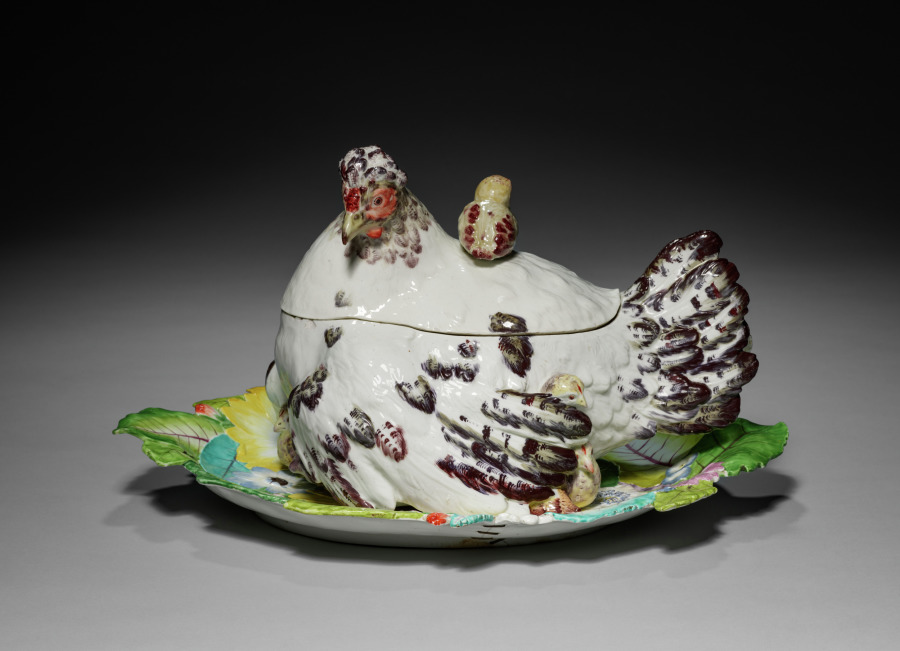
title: Hen and Chicks Covered Tureen on Stand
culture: England, London, Chelsea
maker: Chelsea Porcelain Factory (Britain, London, 1745–84)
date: c. 1755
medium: soft-paste porcelain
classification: Ceramic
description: The ceramic factory at Chelsea, located along the river Thames in western London, was Britain’s most renowned factory of decorative porcelain in the mid-1700s. Large tureens in the form of chickens or rabbits appealed to wealthy aristocrats, who took great care in developing specimen animal and poultry breeds on their country estates. The design for this particular tureen was taken from a popular seventeenth-century print by Francis Barlow depicting a farmyard.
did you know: Though the form of a soup tureen suggests a functional role at the dining table, such large, expensive porcelains were probably only used for decoration because hot liquids might have easily caused them to crack.